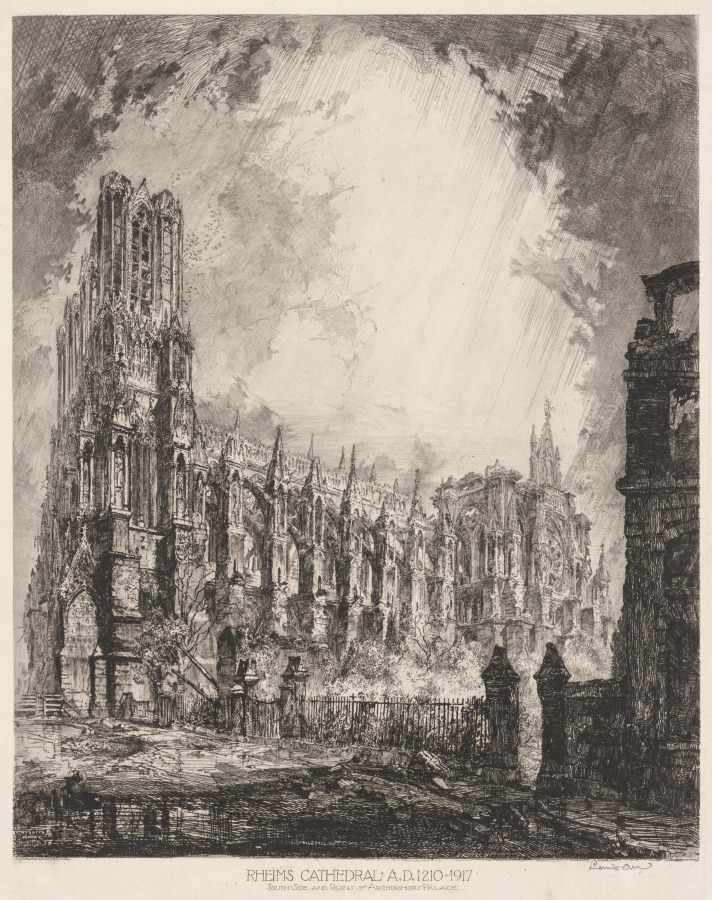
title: Rheims Cathedral and Ruins of Archbishop's Palace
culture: America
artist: Louis Orr (American, 1879–1966)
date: before 1920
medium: etching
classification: Print